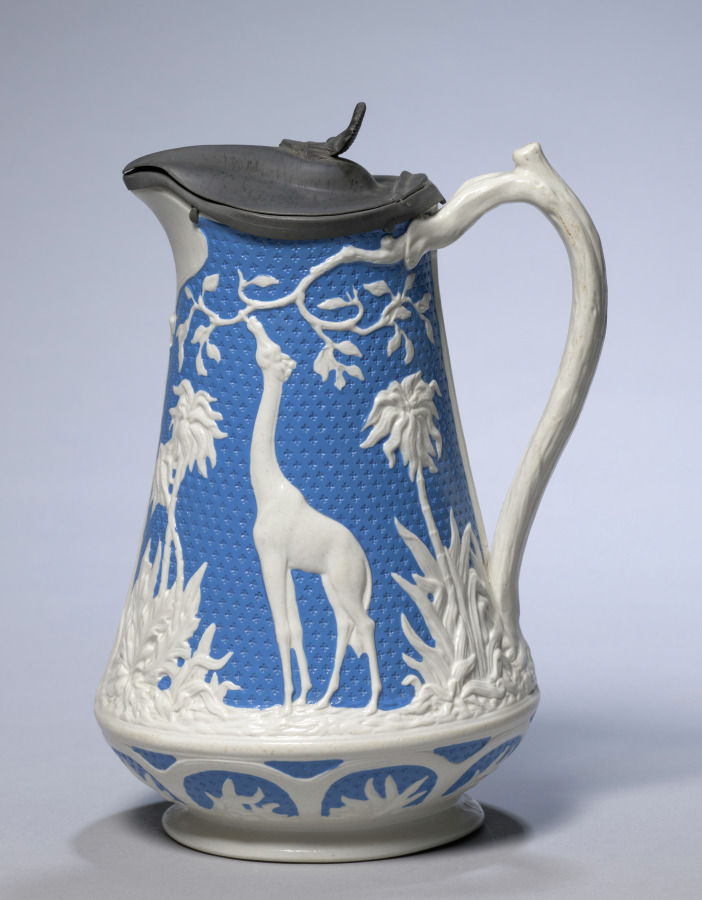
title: Jug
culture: England, Staffordshire, Burslem, 19th century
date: 1850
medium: parian ware with metal rim and cover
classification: Ceramic